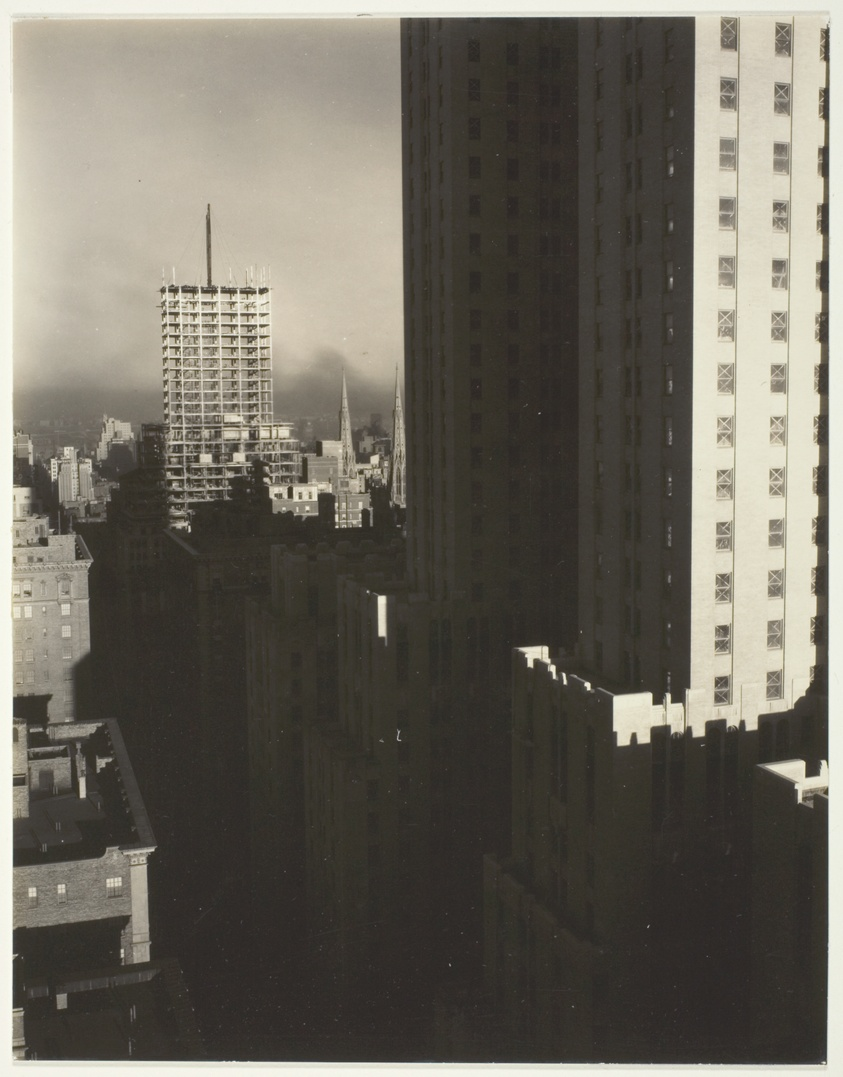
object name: Photograph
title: From My Window at the Shelton, West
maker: Alfred Stieglitz (American, 1864–1946)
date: 1931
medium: Gelatin silver print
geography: United States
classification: gelatin silver (developing-out-paper) pr; photographic process; photography; photograph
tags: cityscapes